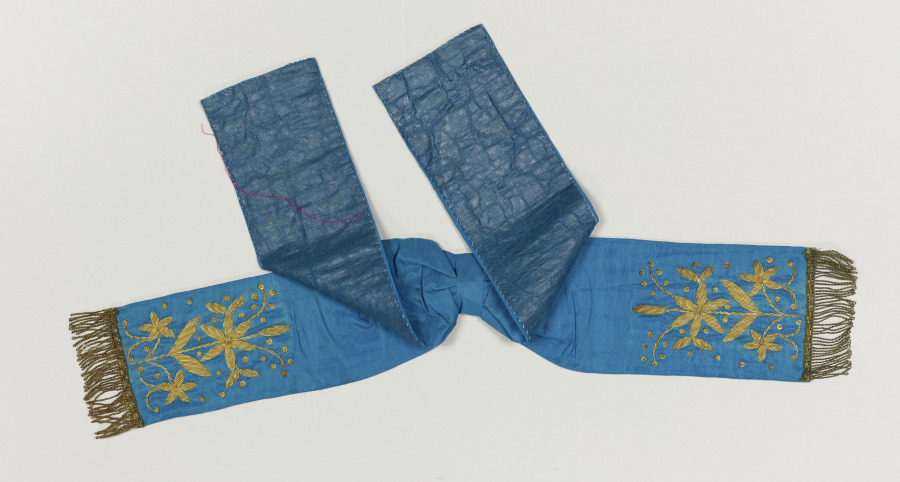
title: Woman's Costume (Blue Silk Band)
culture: Italy, Sicily, 19th century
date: 1800s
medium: silk (blue) with metal thread embroidery and sequins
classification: Garment